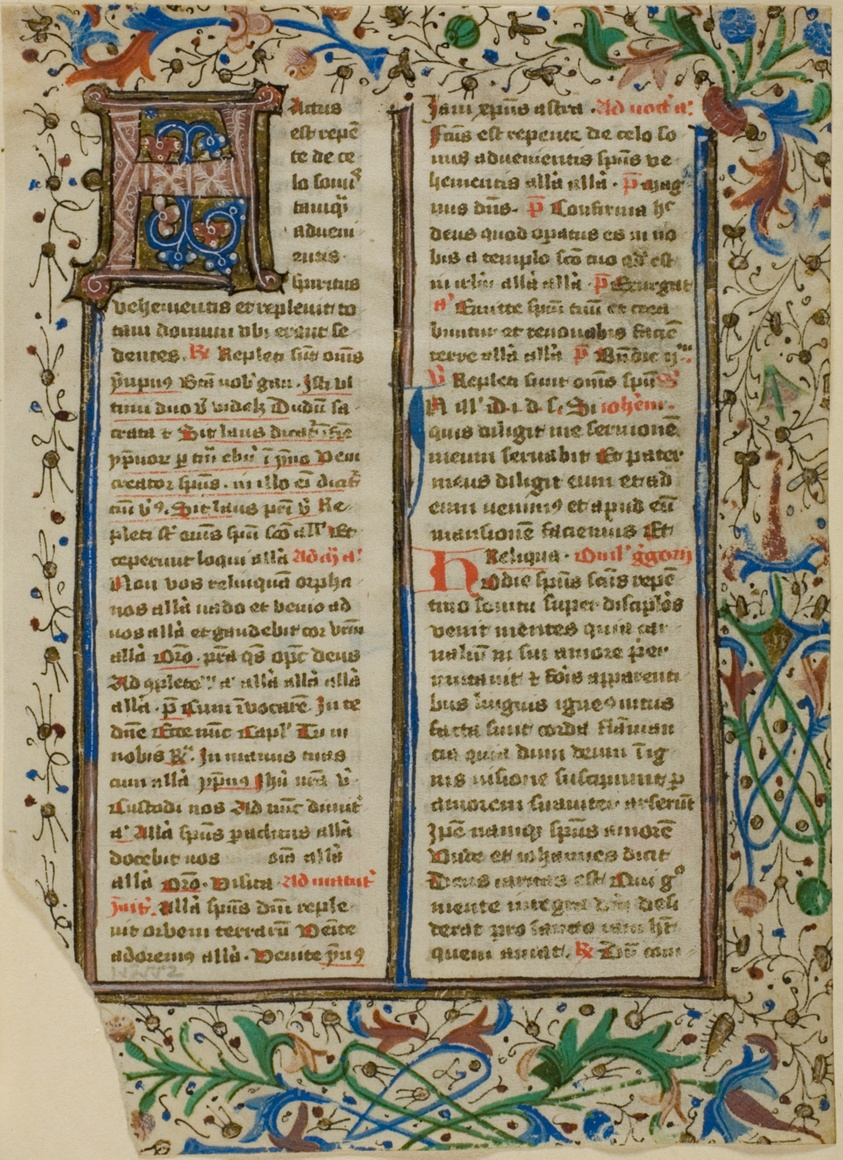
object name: Drawing and Watercolor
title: Illuminated Initial "H" from a Psalter or Breviary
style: medieval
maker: German or Southern Netherlandish (Bruges)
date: c. 1450s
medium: Manuscript cutting in tempera and gold leaf, with Latin inscriptions in brown and red ink, unruled, on vellum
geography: Germany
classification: tempera; manuscript; drawings (visual works); prints and drawing